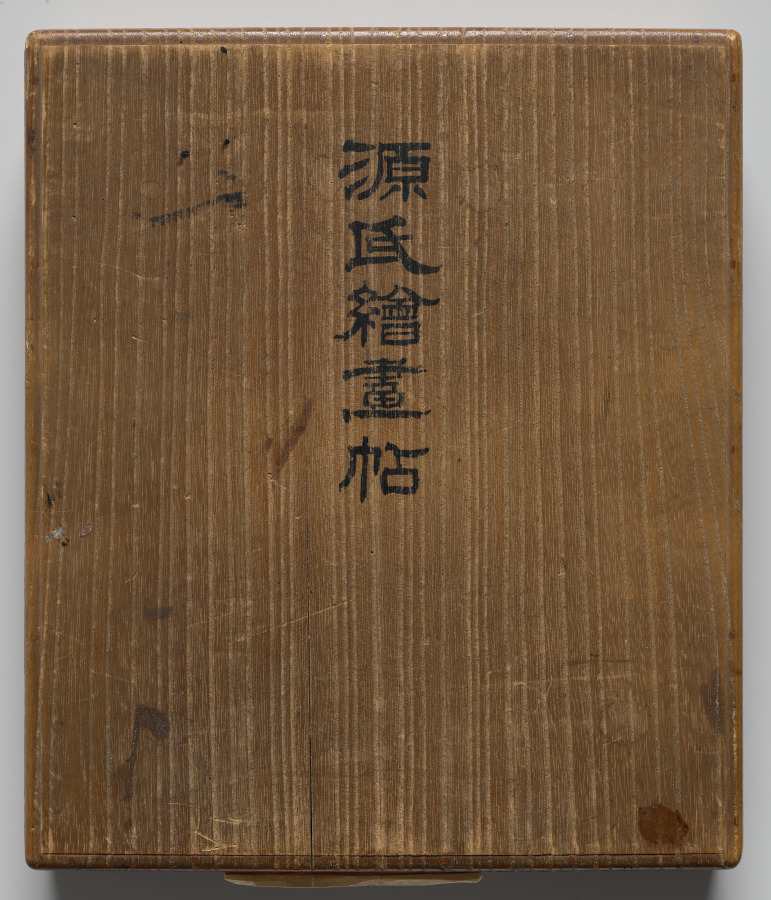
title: Album of Illustrations for the Tale of Genji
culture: Japan, Edo period (1615–1868)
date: 1600s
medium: Double-sided accordion-style album of 17 leaves; ink, light color, and gold on paper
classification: Bound Volume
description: This album contains illustrations for the classic literary work the Tale of Genji, authored in the 1000s by Murasaki Shikibu, an aristocrat of the Heian period (794–1185) court. The scenes are painted in the “white drawing” (hakubyō) mode, in which a fine ink line is used to depict figures and spaces with great subtlety, punctuated only occasionally by traces of red pigment for a character’s lips, a detail of a garment, or a decorative element. These two scenes illustrate episodes from the chapters “Thin Veil of Cloud” (Usugumo) and “Barrier Gate” (Sekiya).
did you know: The illustrations are identified by chapter title in cartouches to the upper right of the paintings.